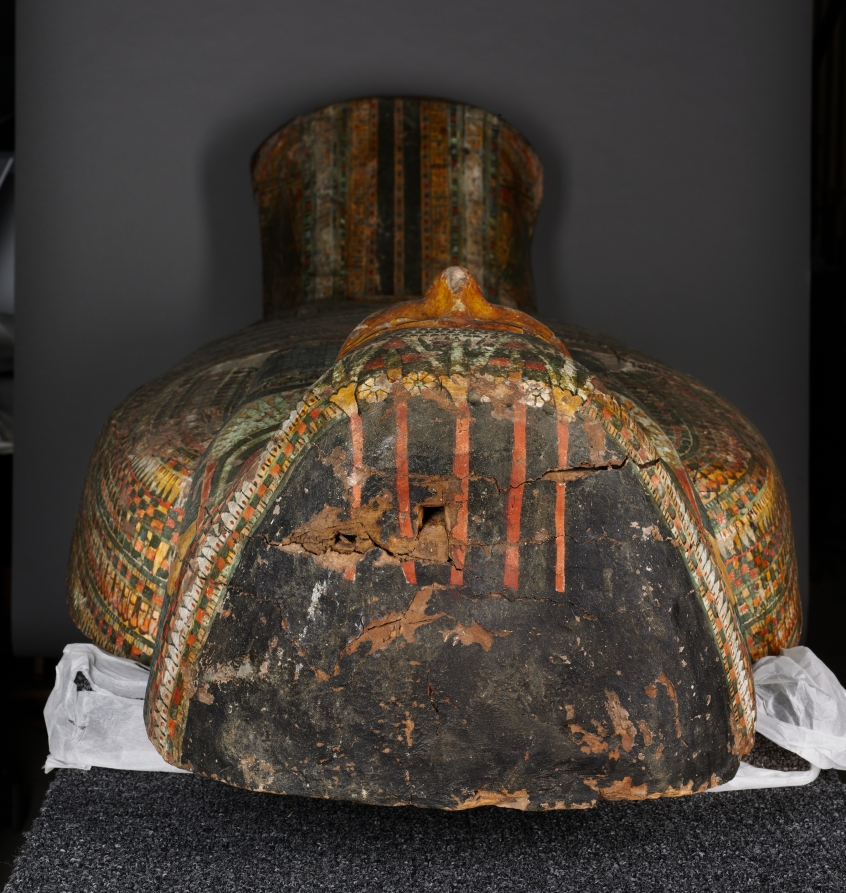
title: Coffin of Nesykhonsu (lid)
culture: Egypt, Third Intermediate (1069–715 BCE), Dynasties 21–22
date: c. 976–889 BCE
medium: gessoed and painted sycamore fig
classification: Funerary Equipment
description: A complete set of coffins during the late New Kingdom and Third Intermediate Period consisted of an outer and inner coffin and a mummy board (essentially a lid without a case, placed directly over the wrapped mummy). Judging by its size, this must have been Nesykhonsu's outer coffin. The type is essentially the same as the coffin of Bakenmut, which was also an outer coffin. The two coffins are said to have been found together and to have belonged to a man and wife. This is quite possible, although the inscriptions do not bear it out. Bakenmut is not mentioned on Nesykhonsu's coffin, nor is she mentioned on his. There was by this time a tremendous repertoire of scenes appropriate for coffin decoration. Whereas Bakenmut's coffin features images of deified dead pharaohs, Nesykhonsu's is decorated in a more personal way with scenes from her own funeral. The main scene in the interior (near the top) shows a priest clad in a panther skin with the mummy of Nesykhonsu behind. The god appears in mummy form and wears a sun disk on his head. The scarab beetle inside the sun disk identifies him as Khepri, the morning sun, and the hieroglyphs to the right identify him as Atum, the evening sun. Taken together, image and text represent the sun god in both his rising and setting, youthful and aged aspects.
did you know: Two of Nesykhonsu's titles, "Lady of the House" and "Singer of the Choir of Mut the Great," are written on the outside of the coffin.